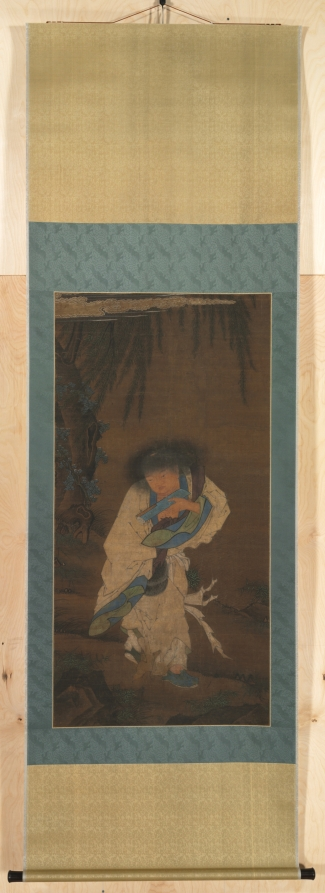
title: Poet and Recluse Hanshan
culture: China, Ming dynasty (1368–1644)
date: 1400s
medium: hanging scroll; ink and color on silk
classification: Painting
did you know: Hanshan, a Tang poet of vernacular verses, is often associated with Chan Buddhism and is considered a deity in disguise.